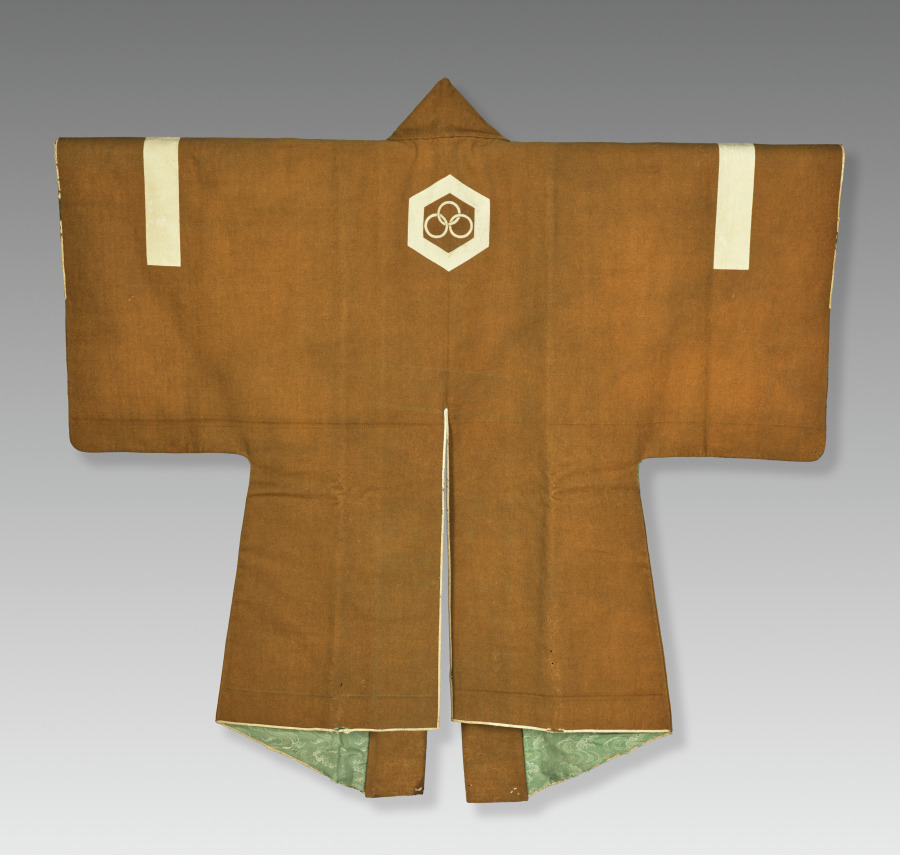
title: Firefighter's Suit (Kaji shōzoku)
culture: Japan, Edo period (1615–1868)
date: late 1700s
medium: Wool (rasha); applique and silk and gold thread cord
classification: Textile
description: Wood architecture in densely populated areas made firefighting a frequent occurrence in the Edo period (1615–1868). Jackets made of leather or wool offered firefighters protection against the flames. Wool was imported from Europe. The triple ring crest in white is of the “three alternating rings” (mitsurin chigai) type framed in a tortoise shell (kikko) motif, and identified the house with which the wearer was affiliated.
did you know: Wool has self-extinguishing properties that protect the wearer from fire.